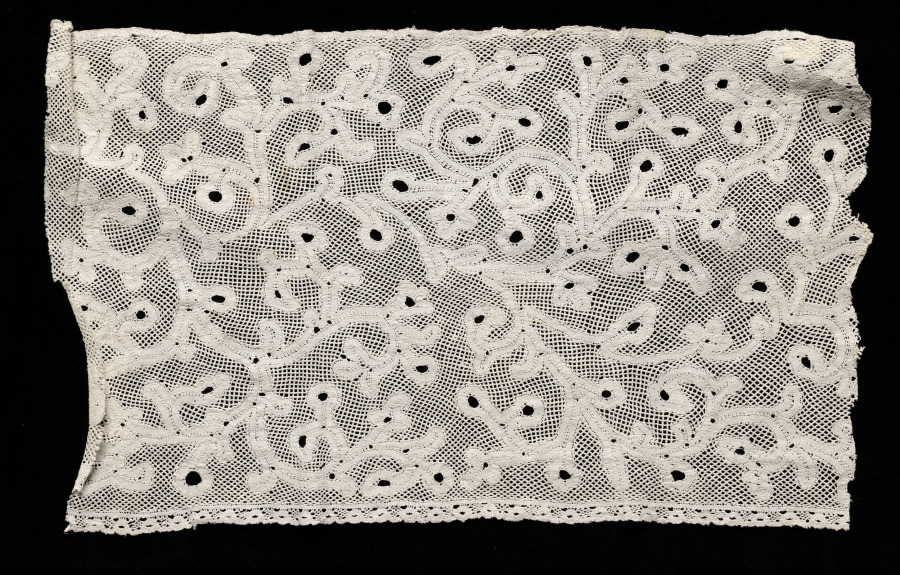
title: Lace Edging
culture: Italy, Sicily(?)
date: 1700s–1800s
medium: Linen: bobbin lace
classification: Lace